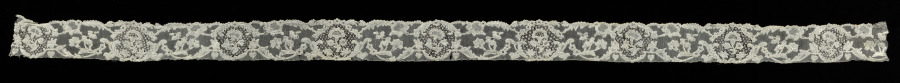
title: Lace Edging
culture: France, Alençon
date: 1700s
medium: Linen: needle lace (Point d'Alençon)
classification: Lace